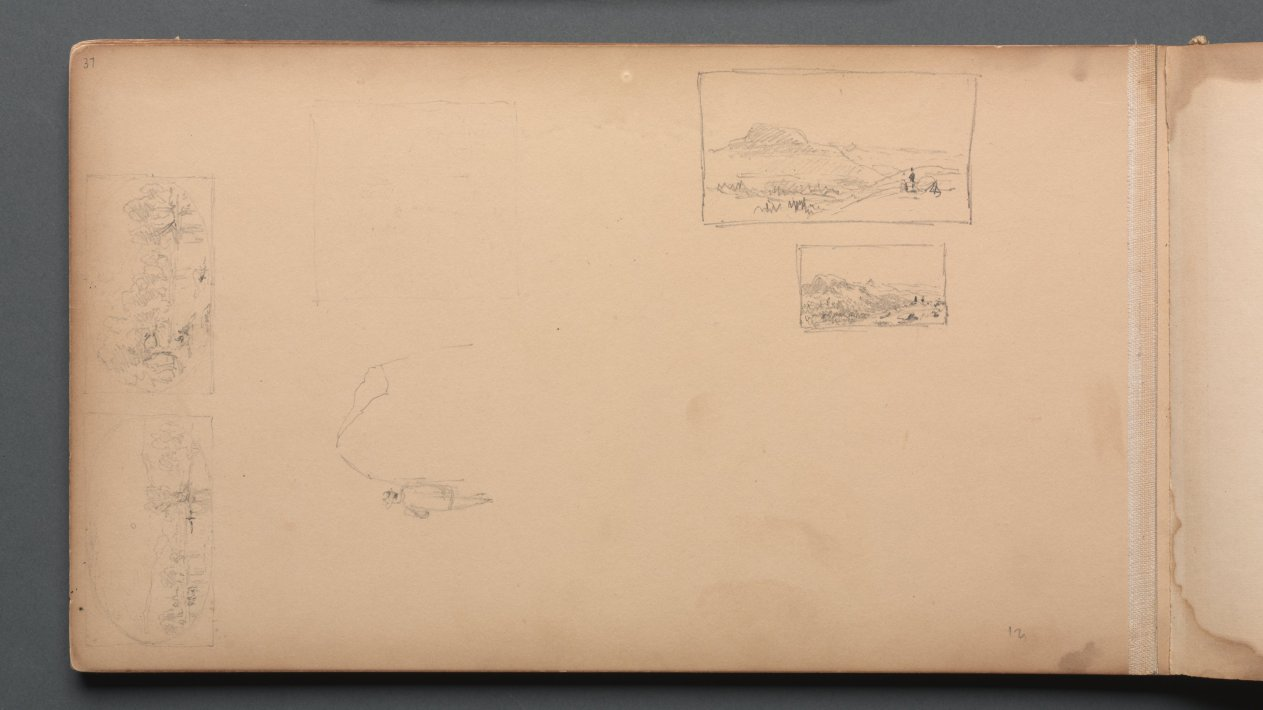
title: Sketchbook, page 37: Maine Landscape Vignittes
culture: America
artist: Sanford Robinson Gifford (American, 1823–1880)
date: 1859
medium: graphite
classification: Bound Volume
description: Gifford was an American landscape painter belonging to the second generation of Hudson River school artists. Based in New York City with a studio at the Tenth Street Studio Building, Gifford took annual summer trips to the Catskills, the Adirondacks, and other scenic locations in New England. This sketchbook accompanied the artist on his expedition in 1859 to New Hampshire and Maine, where he drew sites such as Dixville Notch, the White Mountains, and Peaks Island, Casco Bay. Gifford used such graphite studies as the basis for oil paintings worked up in his studio, such as A Home in the Wilderness (1866).